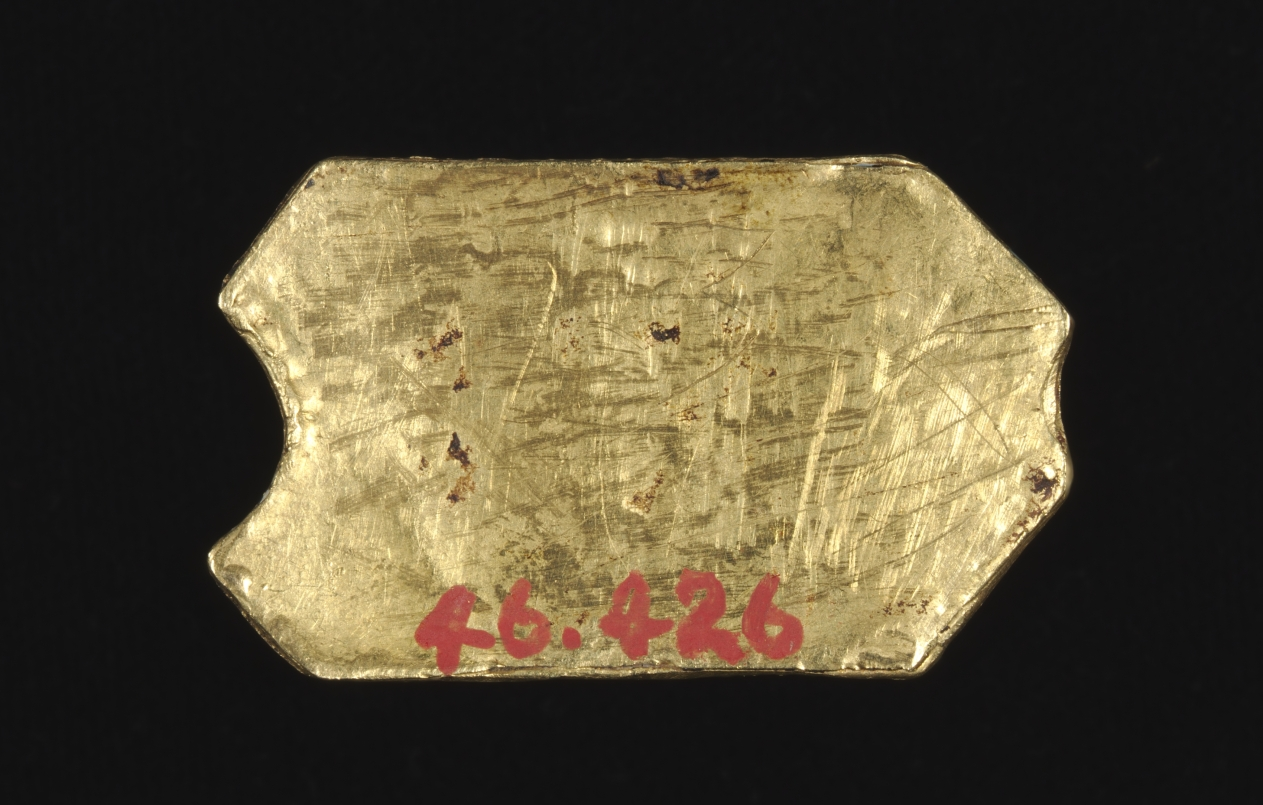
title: Plaque (Appliqué)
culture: Spain (Hispano-Moresque), 14th century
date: 1300s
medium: translucent enamel on gold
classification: Enamel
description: This oblong plaque is decorated with pseudo-Kufic (fake Arabic) designs indicating that it was produced in Spain under Muslim influence. It may have served as an applied ornament to some article of personal adornment such as a belt. It is possible that the design was inspired by Arabic coinage.